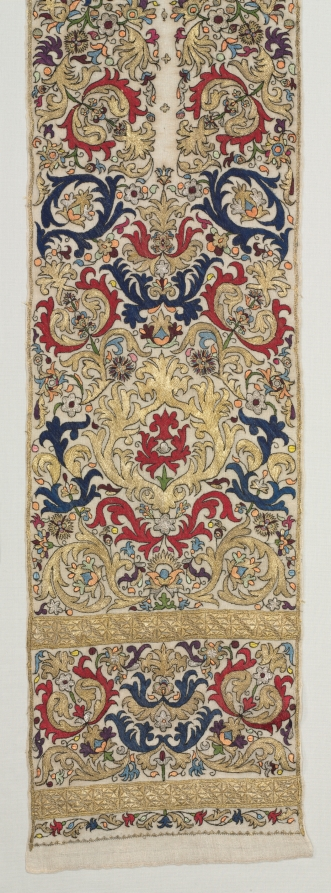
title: Kerchief (tensifa)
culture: Africa, North Africa, Algeria, Algerian embroiderer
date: 1700–1899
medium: Linen, silk, gold, silver, dye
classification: Embroidery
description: This beautiful kerchief, worn wrapped around the head, was part of elegant bathing equipment that well-to-do women wore while relaxing in a hammam after bathing. The floral and foliate embroidery reflect a fashion that lasted for more than a century. This example is dominated by lavish, radiating gold and silver thread.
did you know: Tiny traces of graphite on this textile show us how the artist carefully outlined the design to be embroidered.